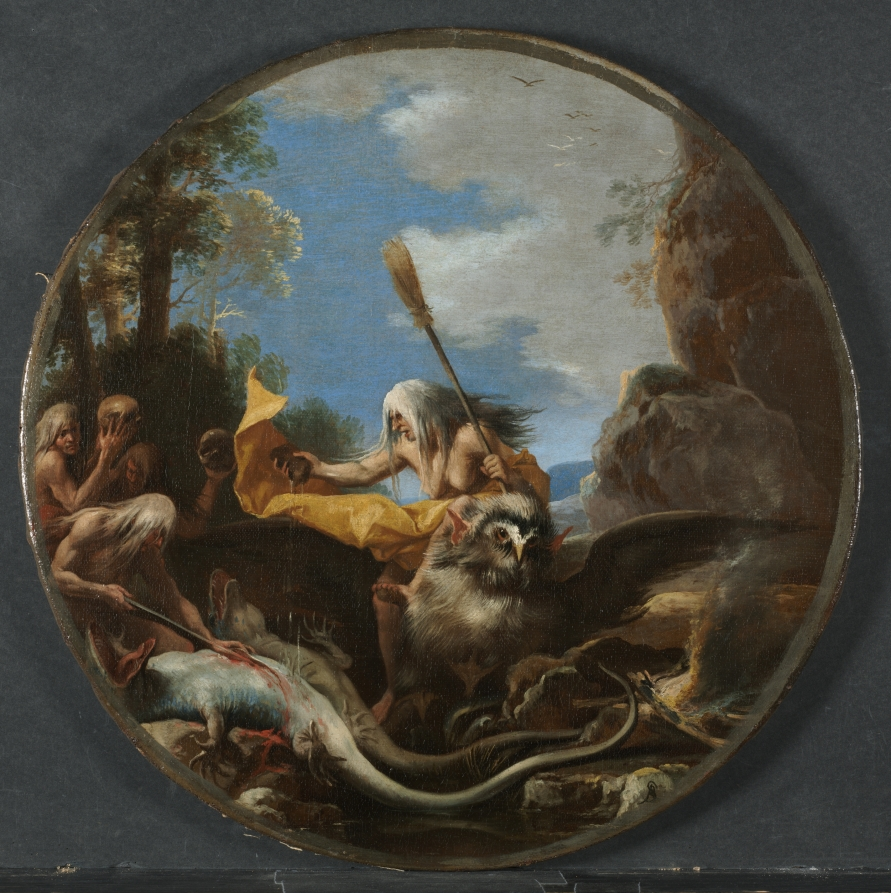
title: Scenes of Witchcraft: Day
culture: Italy, 17th century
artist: Salvator Rosa (Italian, 1615–1673)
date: c. 1645–1649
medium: oil on canvas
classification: Painting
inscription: Signed: "SR [monogram]"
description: Rosa's scene at noon showcases several hoary hags that exemplify his treatment of witches. Clutching skulls, wielding brooms, and slicing lizards, the witches prepare to travel to the Sabbath, an orgy of witches. One witch flays the skin of a thrashing lizard to extract the innards needed to concoct magical unguents, while her companions brandish skulls. Goats were the common mode of transportation for witches, but Rosa substitutes an owl, a harbinger of evil. Although Rosa foregrounds the violent cruelty of witchcraft, situating the grotesque hags in the full light of day introduces a comic aspect to the scene. Rosa's use of comedy and the unexpected to critique the world around him stemmed from the satirical poetry he wrote throughout his stay in Florence and his return to Rome in 1649. By lightening the palette and mood of the painting, Day reflects his interest in satire and his self-appointed role to expose and critique human folly.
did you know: The artist chose the painting's shape to reference the foundational role of the circle in practicing magic.